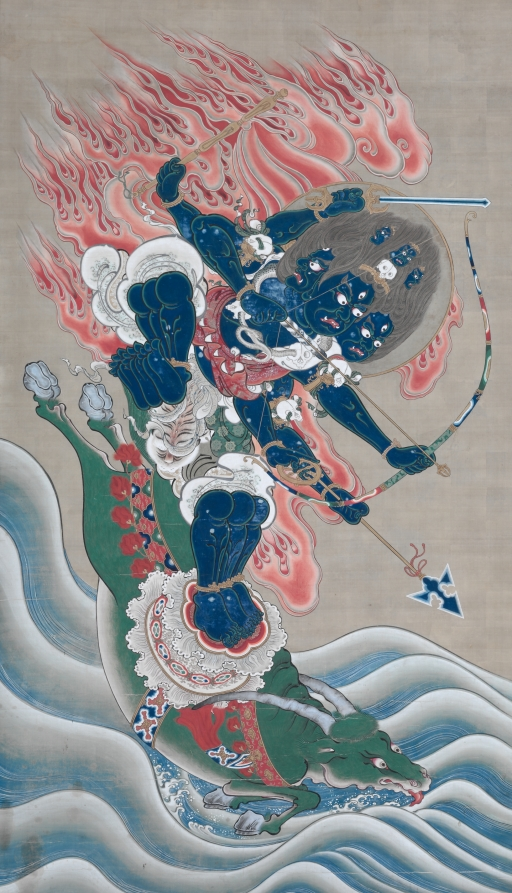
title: Wisdom King of Great Awe-inspiring Power (Daiitoku Myōō)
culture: Japan, Edo period (1615–1868)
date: mid-1800s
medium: Hanging scroll; ink, color, and gold on silk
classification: Painting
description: In Esoteric Buddhism, there is one Buddha at the center of the universe, and four additional Buddhas, each of whom occupies one of the four cardinal directions. These Buddhas also manifest themselves in fierce forms called Kings of Brightness (myōō), or Wisdom Kings. Daiitoku is an avatar of the Buddha Amida and manages the west.